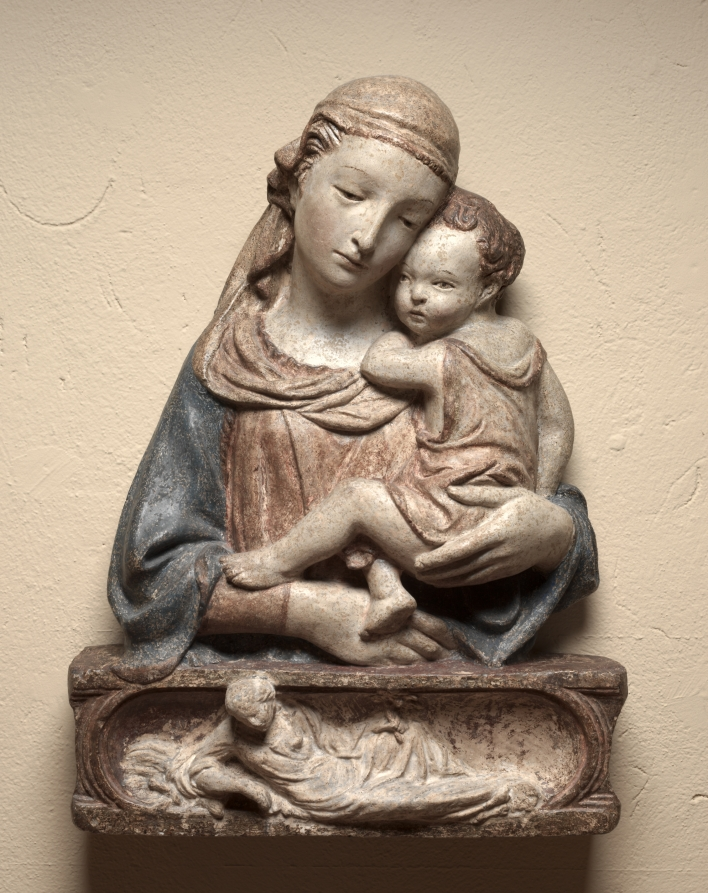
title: Madonna and Child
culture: Italy, Florence, 15th century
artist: circle of Lorenzo Ghiberti (Italian, 1378–1455)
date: c. 1450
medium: polychromed terracotta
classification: Sculpture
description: This half-length Madonna represents one of the finest of about 40 surviving variants, all of which display many characteristics of the Florentine bronze sculptor Lorenzo Ghiberti. These features include serene facial types with narrow eyes and thin eyebrows, the careful arrangement of the Madonna and Child, forehead to cheek, and the infant's twisting pose. The popularity of this devotional relief began around 1420 and continued until around 1500. Ghiberti was the most successful bronze sculptor of the early Renaissance in Florence. His fame rests upon the commissions he received for two sets of bronze doors, completed between 1401 and 1424, for the Baptistry in Florence. The reclining figure of Eve on the base of this Madonna and Child (suggesting Mary as the new Eve) stems from a similar figure on the upper left door of the Porta del Paradiso, the second set of Baptistry doors. Eve's presence on the base clearly substantiates the attribution to Ghiberti and helps date the relief.